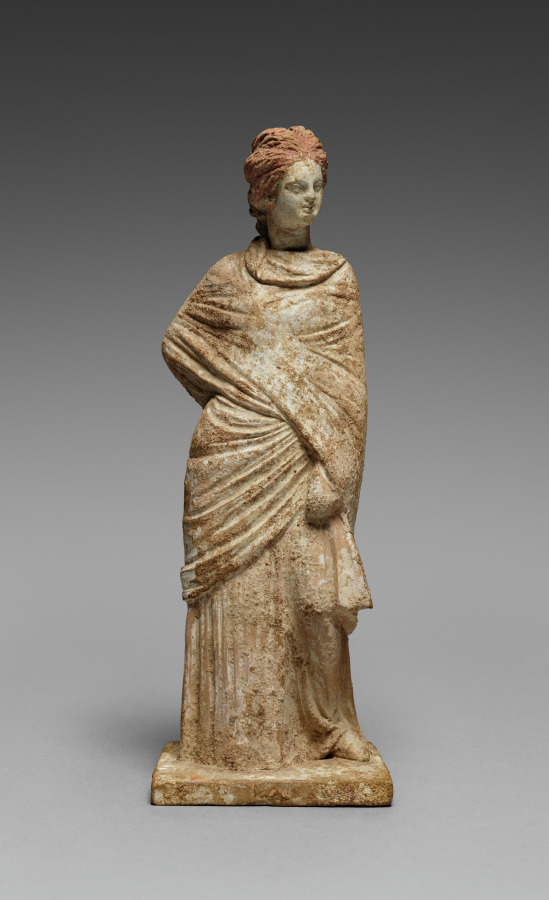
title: Female Figurine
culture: Greece, Tanagra (Boeotia)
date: 330–200 BCE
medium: molded terracotta, painted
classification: Sculpture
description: This figurine depicts an elegantly draped young woman wearing a cloak or himation over a dress called a chiton. The contrast between her sharp elbow and flowing skirts illustrates an interest in the stretch and fold of different fabrics. Originally brilliantly painted, this figurine still has traces of color such as the red hair and the white on her face. The site of Tanagra in central Greece is known for its abundance of terracotta figurines like this one made by mixing and matching different molds.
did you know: This woman’s rolled hairstyle is now called a “melon coiffure.”